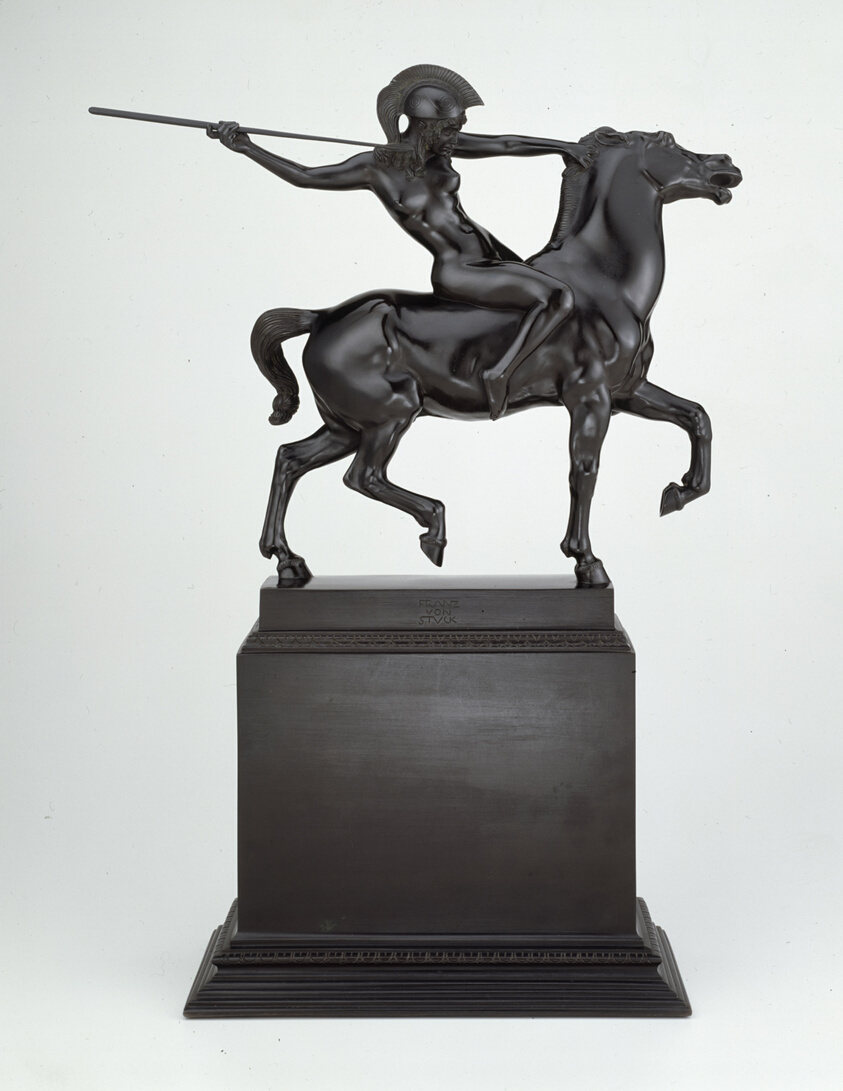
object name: Sculpture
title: The Amazon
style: nineteenth century, 19th century, 20th Century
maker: Franz von Stuck (German, 1863–1928)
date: Modeled 1897, cast after 1907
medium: Bronze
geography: Germany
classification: statuette; sculpture; bronze; german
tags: woman, animals, helmets, horse, nudes, spears, warriors, weapons